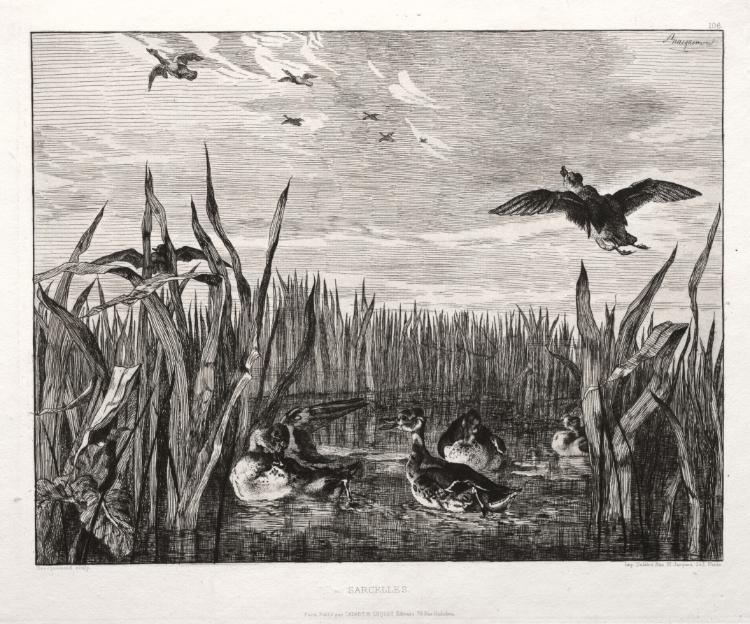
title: Teals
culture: France, 19th century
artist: Félix Bracquemond (French, 1833–1914)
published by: Cadart & Luquet, 79, rue Richelieu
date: 1853 (printed 1864)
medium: etching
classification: Print